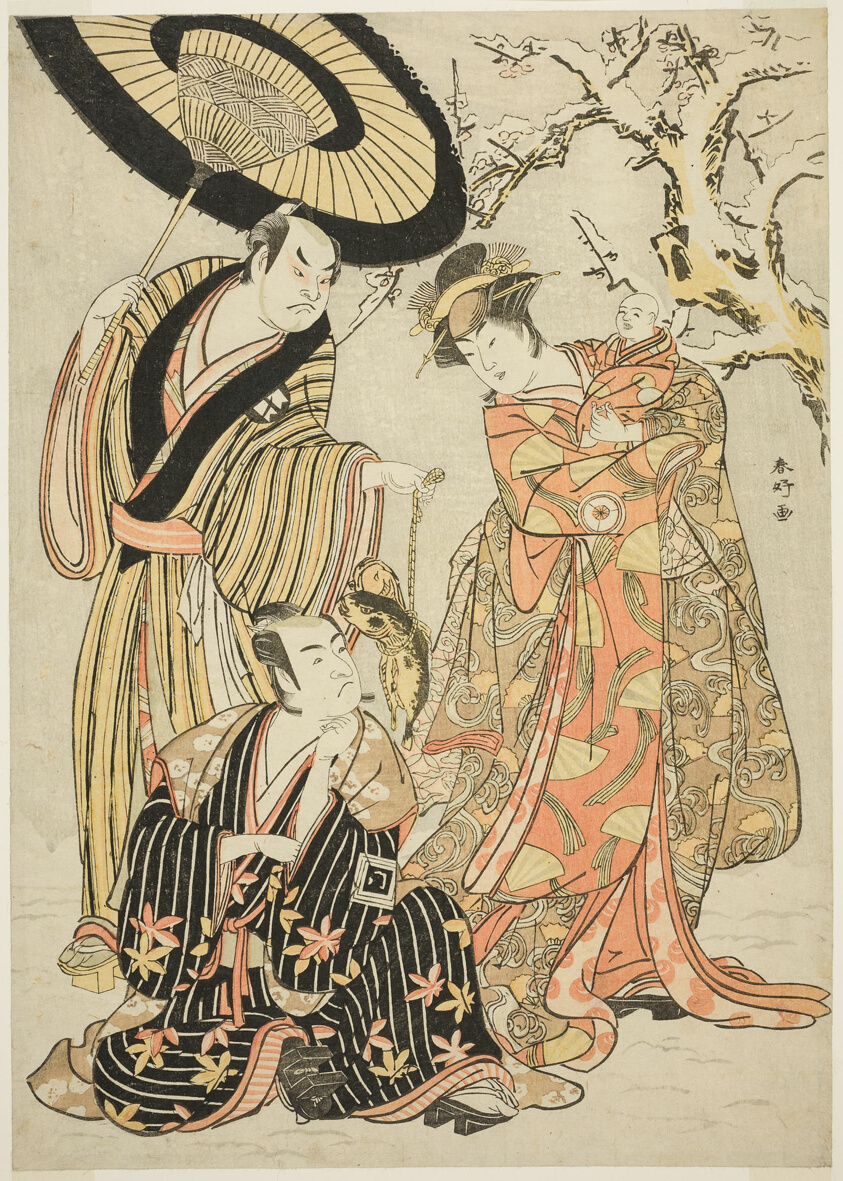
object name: Print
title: Actors Iwai Hanshirô IV, Ichikawa Monnosuke II, and Sakata Hangorô III, in “Snowflakes: Raising the Standard at Izu” (“Mutsu no Hana Izu no Hataage”)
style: Japanese (culture or style)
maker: Katsukawa Shunkô; Japanese, 1743–1812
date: About 1786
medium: Color woodblock print; ôban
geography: Japan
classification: woodblock print; print; asian art